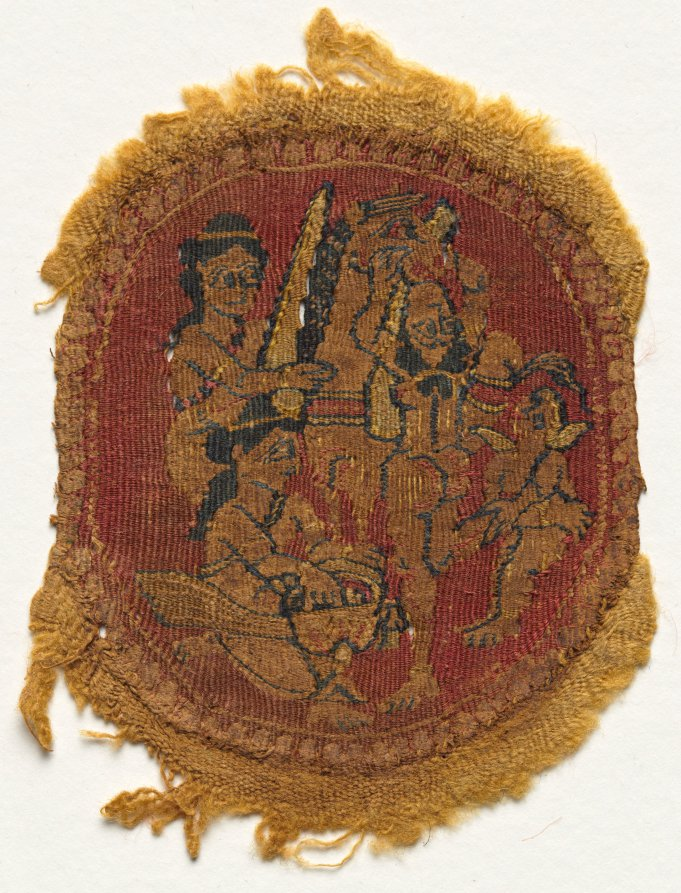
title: Five Round Segmenta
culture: Egypt, Umayyad period (661–750)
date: 650 – 750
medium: tapestry weave: wool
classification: Textile